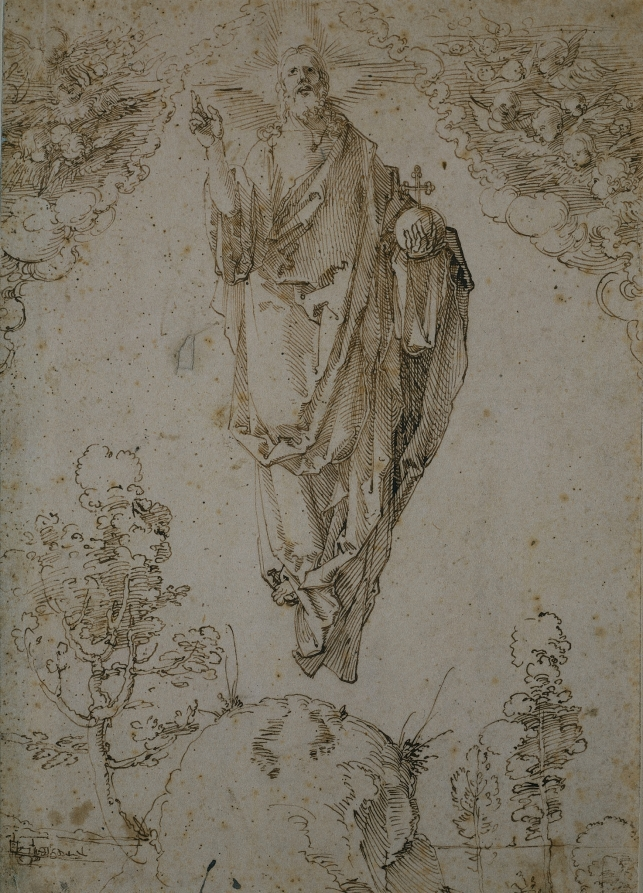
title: Ascension of Christ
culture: Germany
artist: Albrecht Dürer (German, 1471–1528)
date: c. 1515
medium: pen and brown ink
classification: Drawing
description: Forty days after his Resurrection, Christ made his final appearance to his apostles. The story of the Ascension (Acts 1:9-12) tells that Christ's apostles were standing with him on the Mount of Olives when he was lifted up and taken to heaven in a cloud. Dürer depicted Christ with the traditional signs of his role as world saviour-making a gesture of blessing with his right hand and holding a cross-topped globe in his left. The artist included cherubs in the cloud, along with Christ's footprints, which, according to later tradition, were preserved on the Mount of Olives.